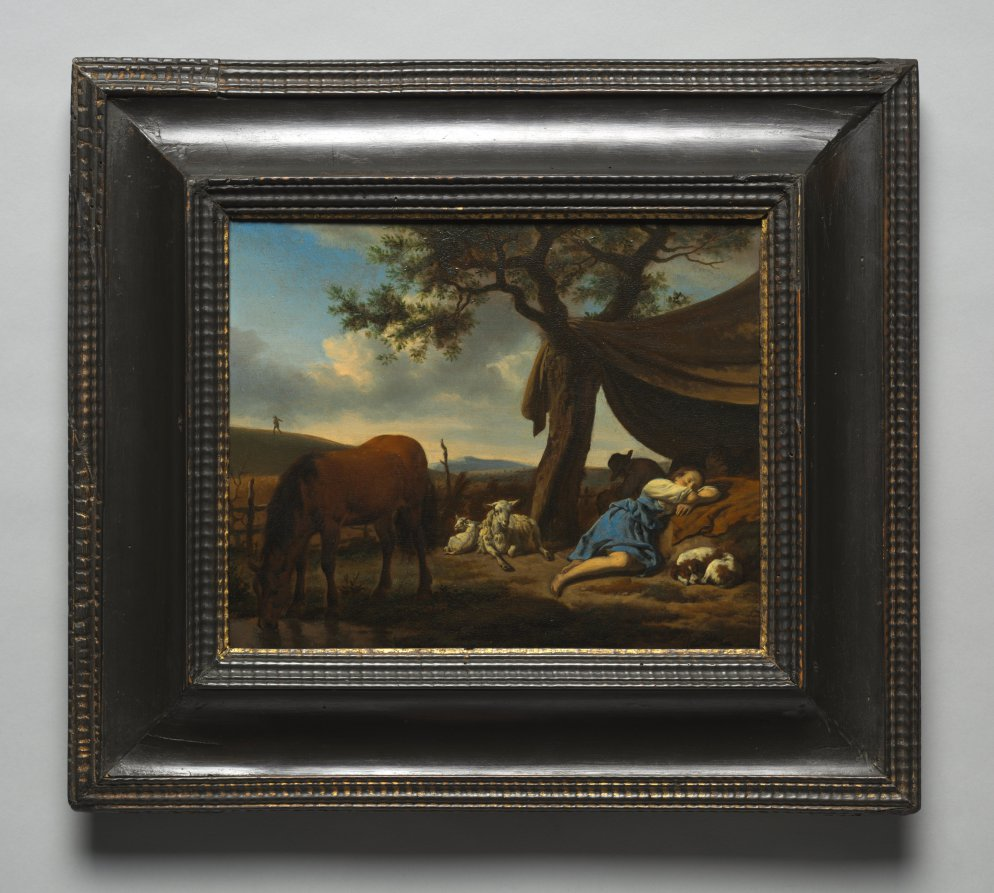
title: Sleeping Shepherds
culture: Netherlands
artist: Adriaen van de Velde (Dutch, 1636–1672)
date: 1663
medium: oil on wood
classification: Painting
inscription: Signed lower right: "A.v.Velde. f / 1663"